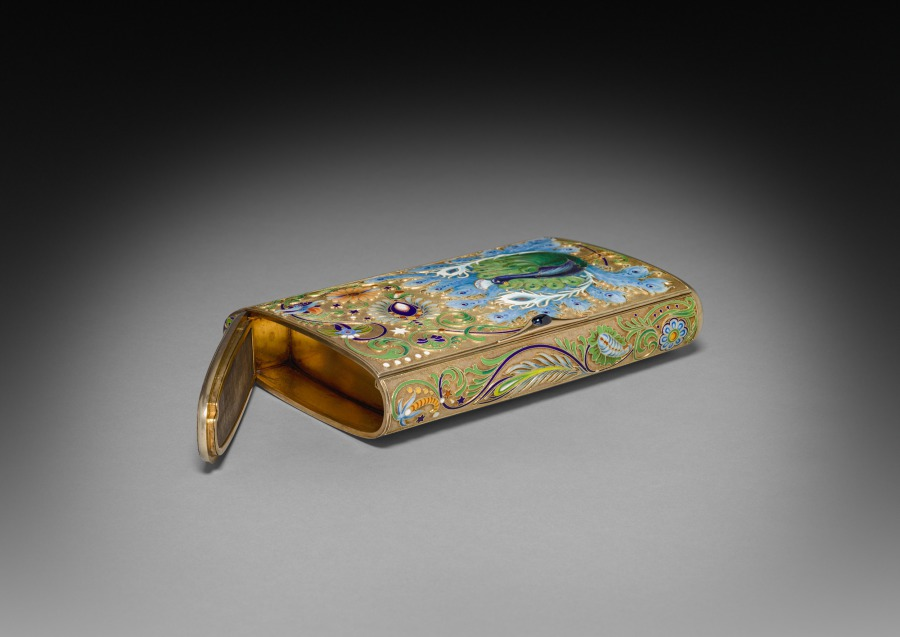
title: Cigar Box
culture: Russia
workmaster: attributed to Feodor Ivanovich Rückert (Russian, 1840–1917)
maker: House of Fabergé (Russian, 1842–1918)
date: c. 1896–1908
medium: Silver gilt, enamel, sapphire set in gold; [reproduction silk tinder cord, gold and moonstone catch]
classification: Silver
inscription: C. Fabergé (in Cyrillic); double-headed eagle [imperial warrant]; 84, Kokoshnik, tester's initials [assay mark for Moscow, 1896-1908]; scratched 16358.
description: Fabergé’s craftsmen in Moscow became known for their work in the pan-Slavic or neo-Russian taste, hearkening back to 17th-century styles of Russian folk decoration. In this whimsically oversized box for cigars or loose tobacco, Fabergé used the technique to highlight a symbol of imperial royalty, the preening peacock, here rendered in brilliant hues of blue and green enamels.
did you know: Peacocks were considered a symbol of imperial royalty in Russia.